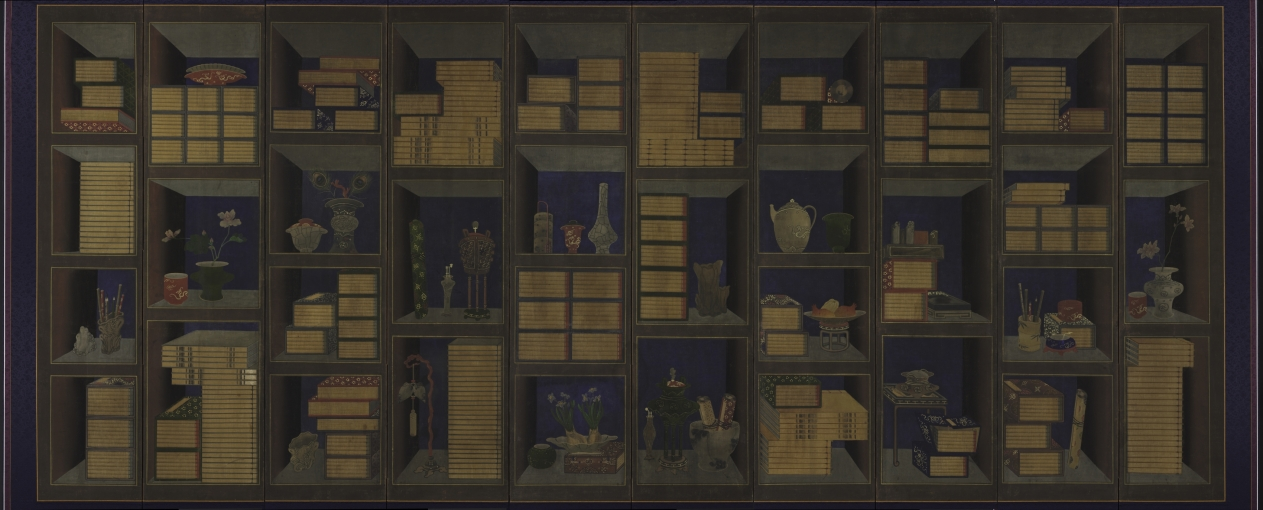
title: Books and Scholars’ Accoutrements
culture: Korea, Joseon dynasty (1392–1910)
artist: Yi Taek-gyun (Korean, 1808–after 1883)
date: late 1800s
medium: ten-panel folding screen; ink and color on silk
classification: Painting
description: First produced around the second half of the eighteenth century, chaekgado (literally, “pictures of bookshelves”) flourished throughout the 1800s as a royal emblem. And soon this pictorial genre became a popular furnishing item for aristocrats' elegant studies. The third panel from the right bears a hidden seal that reveals the artist: Yi Taek-gyun, a prominent court artist active in the late 1800s.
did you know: A convincing hypothesis that connects the Korean chaekgado tradition with the Renaissance tradition of illusionistic studiolo through the technique of trompe-l'œil and Chinese Qing period treasured cabinet paintings was first made in Park Shim-eun's thesis (2002).